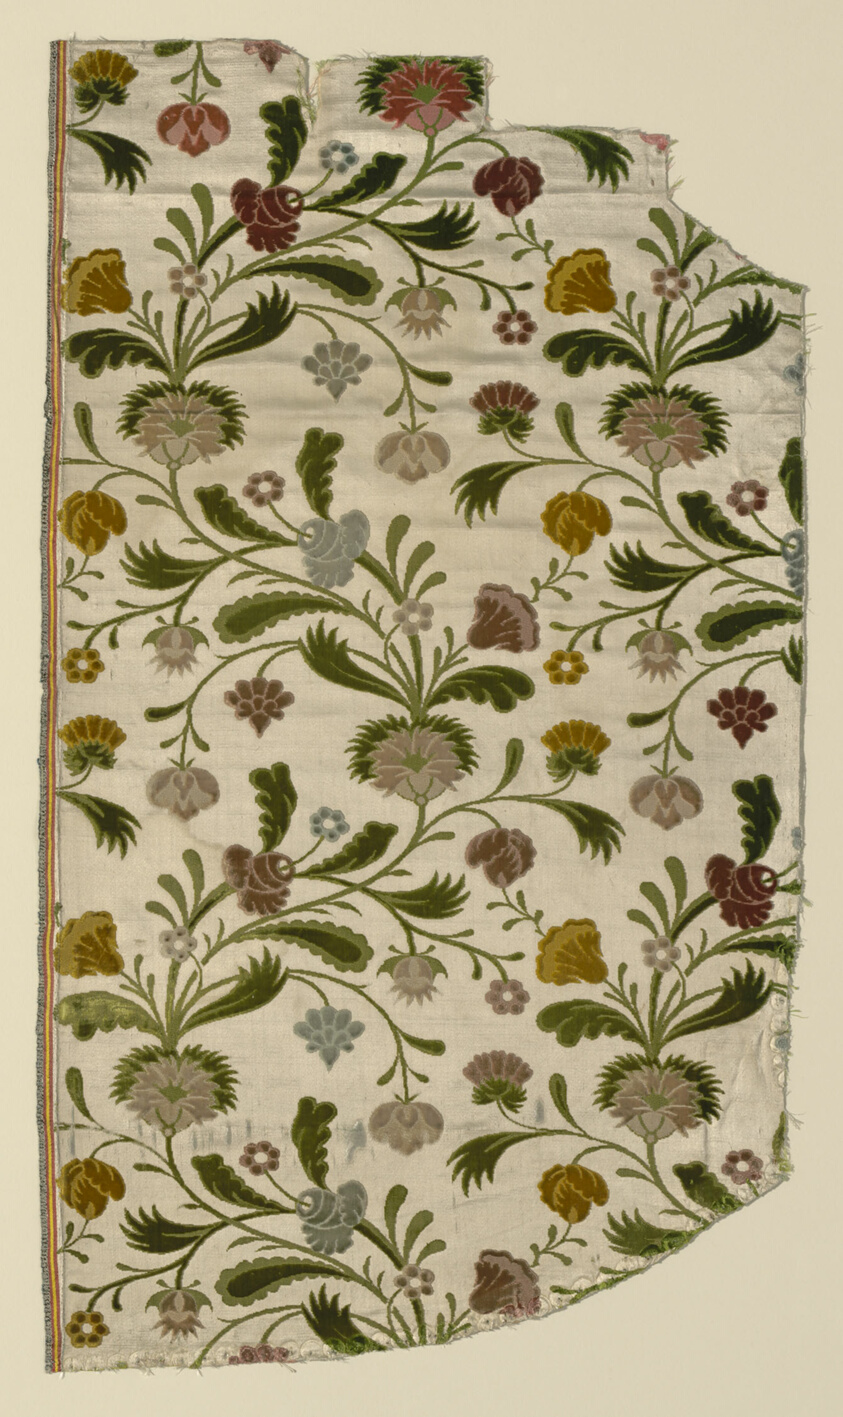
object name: Textile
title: Fragment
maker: France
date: Mid–18th century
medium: Silk, cut, uncut, voided velvet against satin weave foundation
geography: France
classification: textile; weaving; weaving - velvet